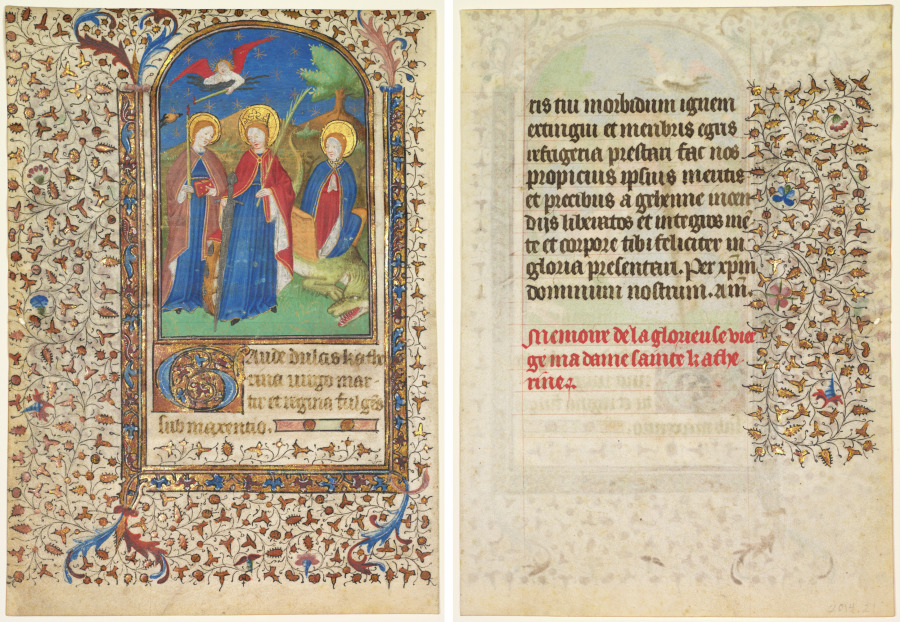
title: Leaf from a Book of Hours: Sts. Geneviève, Catherine of Alexandria, and Margaret (recto) and Text (verso)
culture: France, Paris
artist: workshop of Boucicaut Master (French, Paris, active about 1410–25)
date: c. 1415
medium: ink, tempera, silver, and gold on vellum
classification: Manuscript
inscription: Gaude dulcis katherina virgo martr et regina ful ges sub marinuo...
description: This leaf’s illumination includes Saints Geneviève, Catherine of Alexandria, and Margaret, all early church saints, virgins, and martyrs. During the 1400s and 1500s, the popularity of female saints increased, as did the literacy rate among women, thanks to books of hours. Saint Genevieve is shown with a candle the devil is trying to extinguish while an angel relights it. Saint Catherine, in the center, holds a palm branch and a sword, with which she was executed. Saint Margaret stands on the dragon from whom she emerged clean and unharmed when the cross she carried irritated the dragon’s innards.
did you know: A typical book of hours contains around a dozen suffrages or individualized prayers to specific saints.